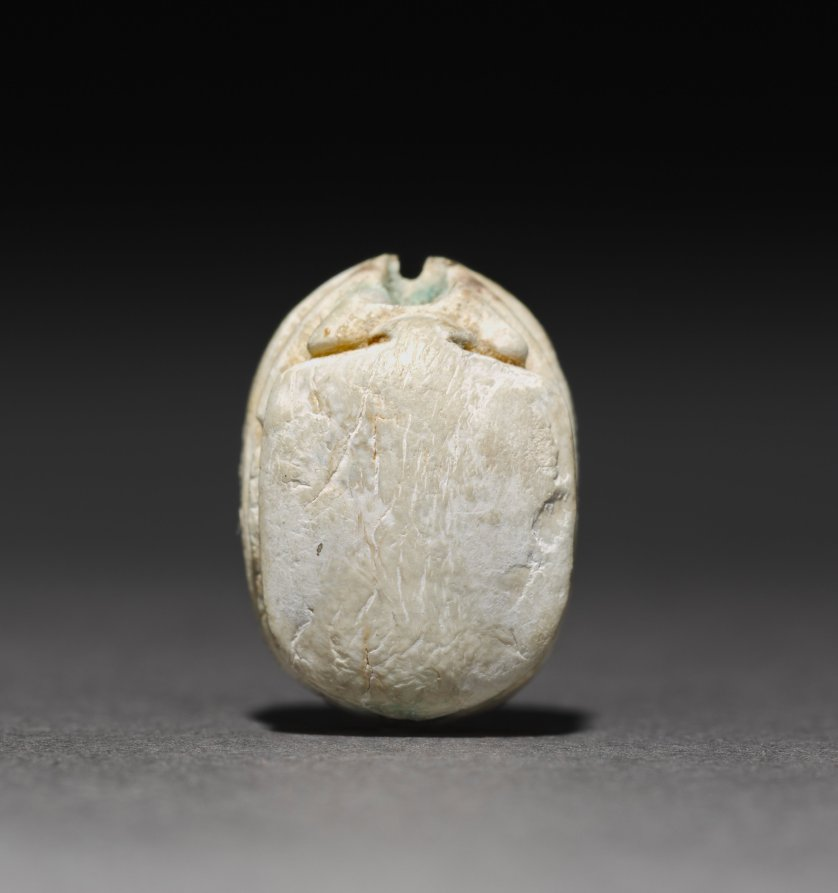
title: Scarab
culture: Egypt, Haraga, Wadi I, no number, Second Intermediate period (1648–1540 BCE)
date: 1980–1900 BCE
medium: turquoise-glazed steatite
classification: Scarabs